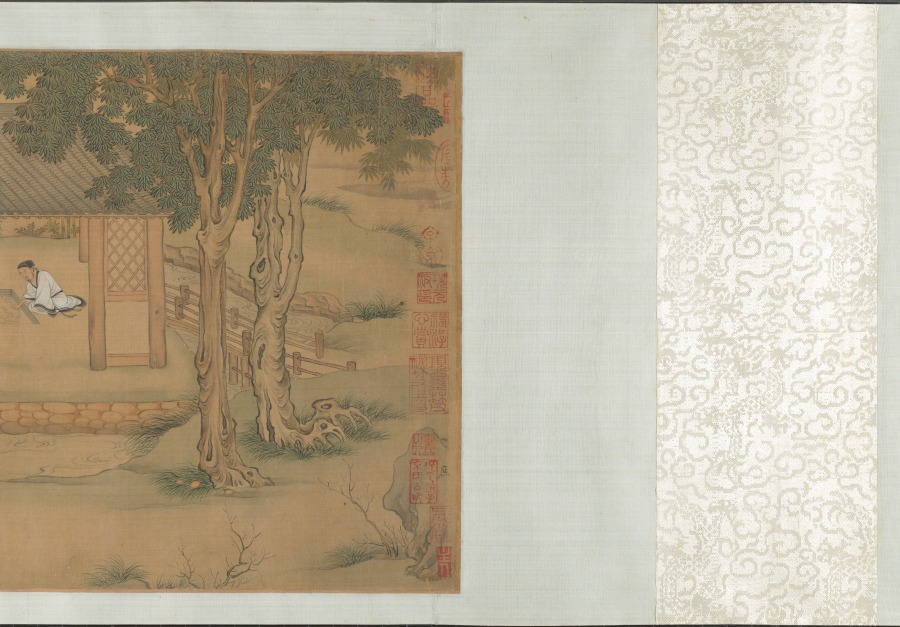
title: Garden for Solitary Enjoyment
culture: China, Ming dynasty (1368–1644)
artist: Qiu Ying (Chinese, 1494–1552)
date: 1515–52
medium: Handscroll; ink and light color on silk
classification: Painting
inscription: Accompanying text of an essay together with seven poems of Sima Guang (1019–1086) and one poem of Su Shi (1037–1101) written by Wen Zhengming (1470–1559) in 1558.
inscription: 2 colophons and 82 seals: 4 seals of Wen Zhengming 文徵明 (1470–1559); 59 seals of Xiang Yuanbian 項元汴 (1525–1590); 1 colophon, dated 1644, and 7 seals of Xiang Yukui 項禹揆 (c. late 1500s–1659); 1 colophon, dated 1880, and 2 seals of Weng Tonghe 翁同龢 (1830–1904); 2 seals of Ch'eng Chen-i (19th c.); 1 seal of Han Ch'ung (19th c.); 4 seals of Wan-go H. C. Weng 翁萬戈 (1918–2020); 3 seals unidentified.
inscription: Colophon by Xiang Yukui 項禹揆 (c. late 1500s–1659): The painting of The Garden for Self-enjoyment on the right by Shih-chou, Mr. Qiu [Qiu Ying] is in the style of Li Lung-mien. Its mood is peaceful, as if meeting the ancient gentlemen face to face among the brushes and silk; it lifts one above the sordid bustle of life. Formerly, my late father handed me this scroll which had only the painting without the written essay. I considered asking a good calligrapher to write the essay to add to it but was afraid that the quality of the writing would not match the painting. Several years later, I saw at a friend's house this essay and poems (of Ssu-ma Kuang] written by Hengshan [Wen Zhengming], once owned by my grandfather; so I spared no expense to obtain it. I rejoiced at this and said: "The divine swords are finally united. How things are pre-destined!" Now my friend Chang Kung-chao's technique for mounting [painting and calligraphy] is excellent. Therefore by daring to take them out and join them together, I can preserve this beautiful story of singular reunion. Xiang Yukui recorded at Hai-yeh-t'ang [hall] two days before New Year's Eve in the jiasheng year of the Chongzhen era [1644]. trans. LYSL/HK/WKH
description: Garden of Solitary Enjoyment refers to a site built in 1073 by the statesman Sima Guang (1019–1086) after he had retired to Luoyang, Henan province. Every spring, visitors would flock to his garden. Each of its seven structures references a historic figure. Sima wrote: I channel streams [like Du Mu], to water flowers [like Bai Juyi], or trim bamboo [like Wang Huizhi]. . . . I know of no joy between heaven and earth that could take its place. Qiu Ying’s painting, created after an 11th-century version of the same theme, must have appealed to garden owners of the Ming dynasty, since it became the template for numerous Suzhou workshop copies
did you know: Sima Guang completed his monumental survey of Chinese history, Zizhi tongjian, in the garden depicted in this painting.